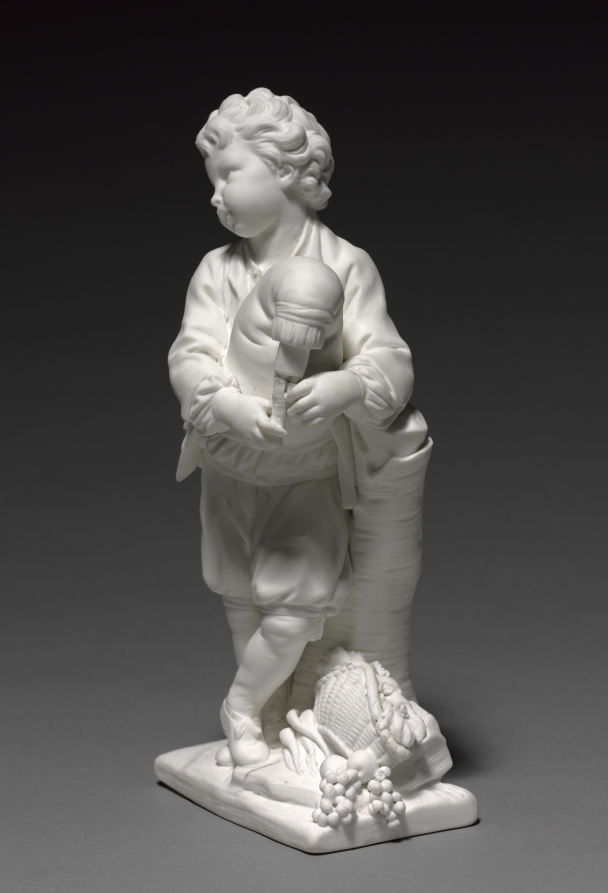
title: Figure of the Bagpiper (Le Joueur de musette)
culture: France, Vincennes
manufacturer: Vincennes Porcelain Factory (France, 1740–56)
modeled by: Pierre Blondeau (French)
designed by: François Boucher (French, 1703–1770)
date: 1748–52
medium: unglazed soft-paste porcelain (biscuit)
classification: Ceramic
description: Although a few Vincennes porcelain figures exist that are glazed, the royal factory adopted at an early date the practice of producing unglazed biscuit figures that, because of the purity of their material, resemble marble figurines. The fashion for biscuit figures first introduced at Vincennes quickly spread through Europe.